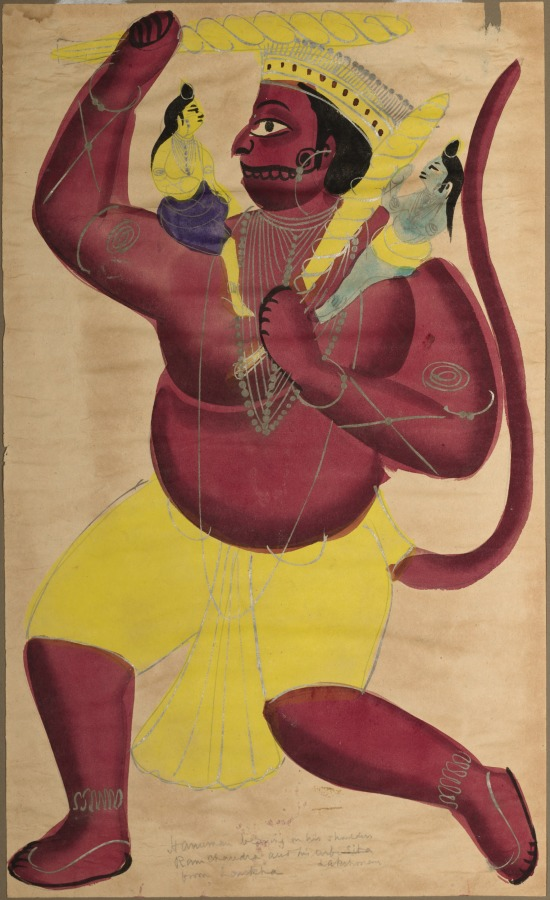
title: Hanuman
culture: Eastern India, Bengal, Kolkata, Kalighat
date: c. 1880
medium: Gum tempera, graphite, and ink on paper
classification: Painting